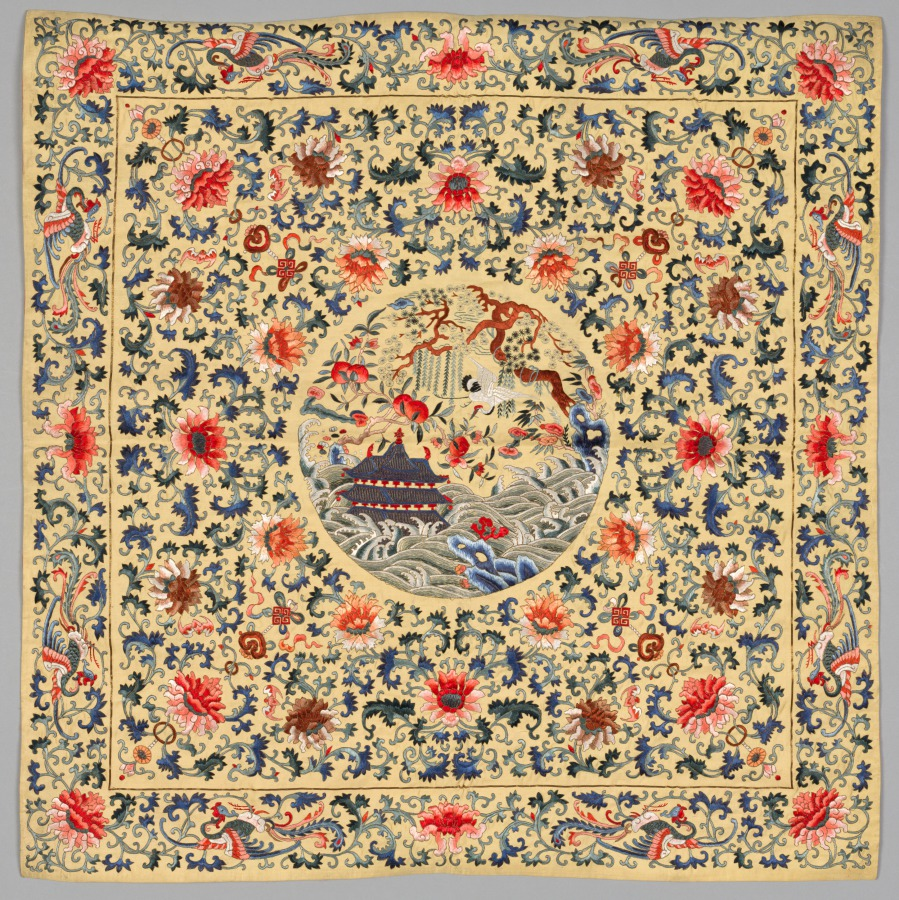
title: Table Cover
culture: China, late 19th century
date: late 1800s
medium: embroidery, silk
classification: Embroidery